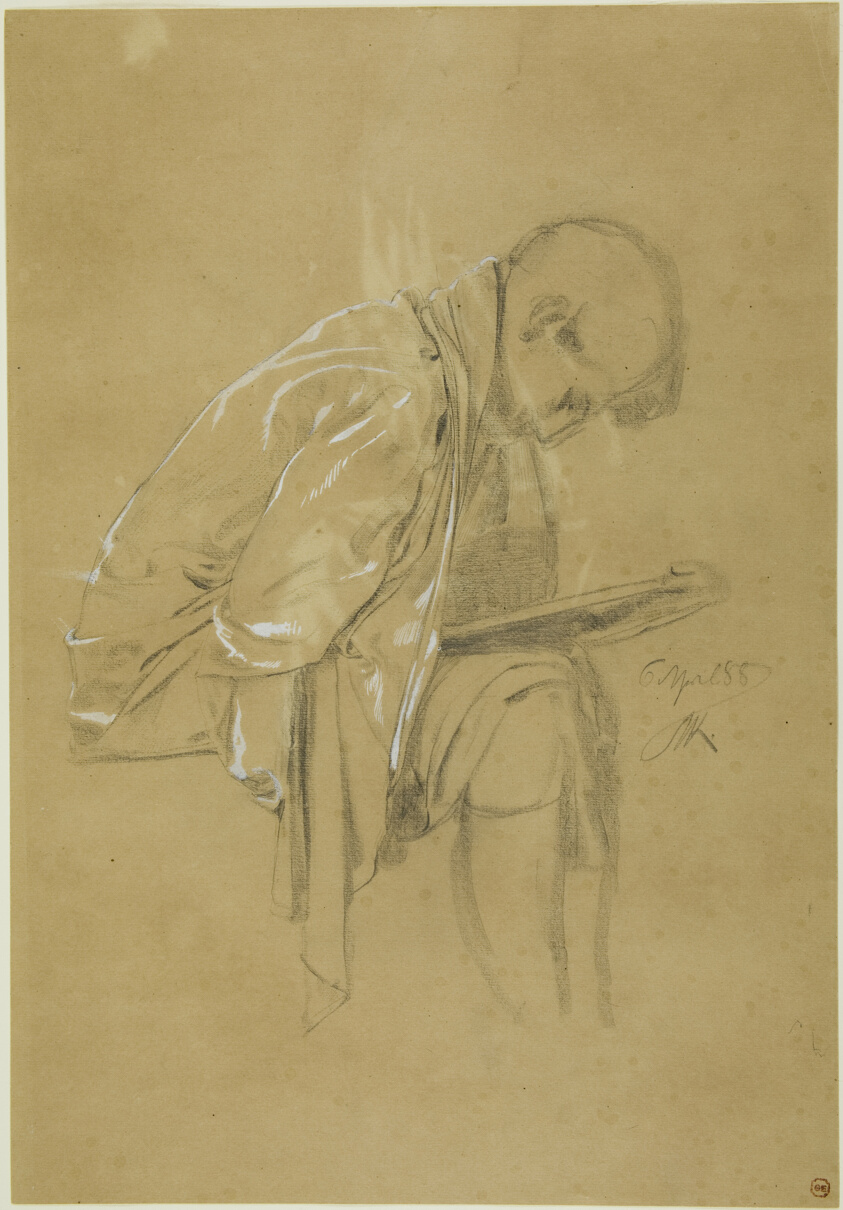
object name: Drawing and Watercolor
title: The Chronicler (recto and verso)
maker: Max Klinger (German, 1857-1920)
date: April 5, 1888 (recto); April 6, 1888 (verso)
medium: Graphite, heightened with white goauche (recto and verso), on tan wove paper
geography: Germany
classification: graphite; drawings (visual works); prints and drawing